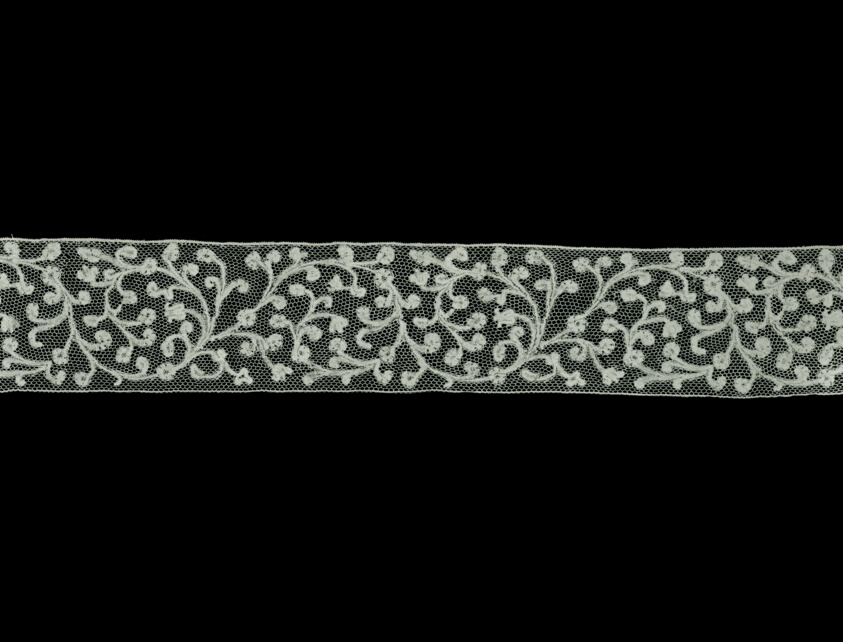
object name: Textile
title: Border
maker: Flanders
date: 1675/1700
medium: Linen, bobbin part lace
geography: Flanders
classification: textile; lace - bobbin